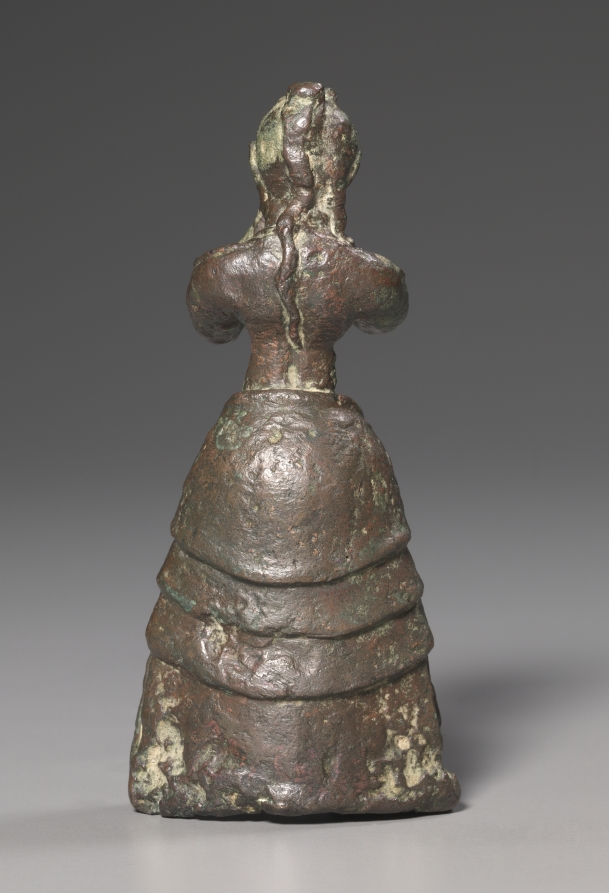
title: Female Worshiper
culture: Crete, Minoan, middle Minoan III–late Minoan I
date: c. 1600–1500 BCE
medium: bronze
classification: Sculpture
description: This extremely rare Minoan bronze statuette represents a girl worshiping a deity. It was probably left as a dedication to a divinity. She wears a flounced skirt over a sleeved robe open at the front. The figure shows a remarkable degree of detail, including looped earrings, bracelets, and a necklace. Her shaved hairstyle, not found on any other Minoan bronze statuette, matches that of painted figures in roughly contemporary frescoes uncovered on the island of Thera, north of Crete. Its excellent condition, rarity, fine detail, and balanced proportions set it apart from other statuettes of its type to have survived.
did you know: The shaved head with prominent locks of hair indicates that this female votive figure is an adolescent.